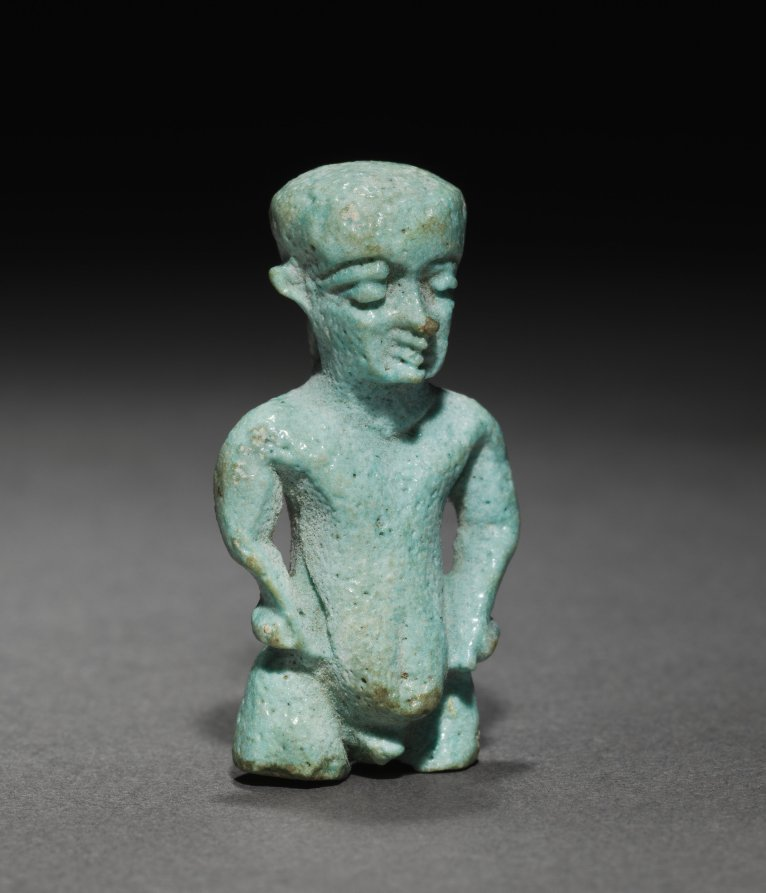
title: Amulet of Pataikos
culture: Egypt, Greco-Roman period (332 BCE–395 CE), Ptolemaic dynasty (305–30 BCE)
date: 305–30 BCE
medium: pale blue faience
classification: Amulets